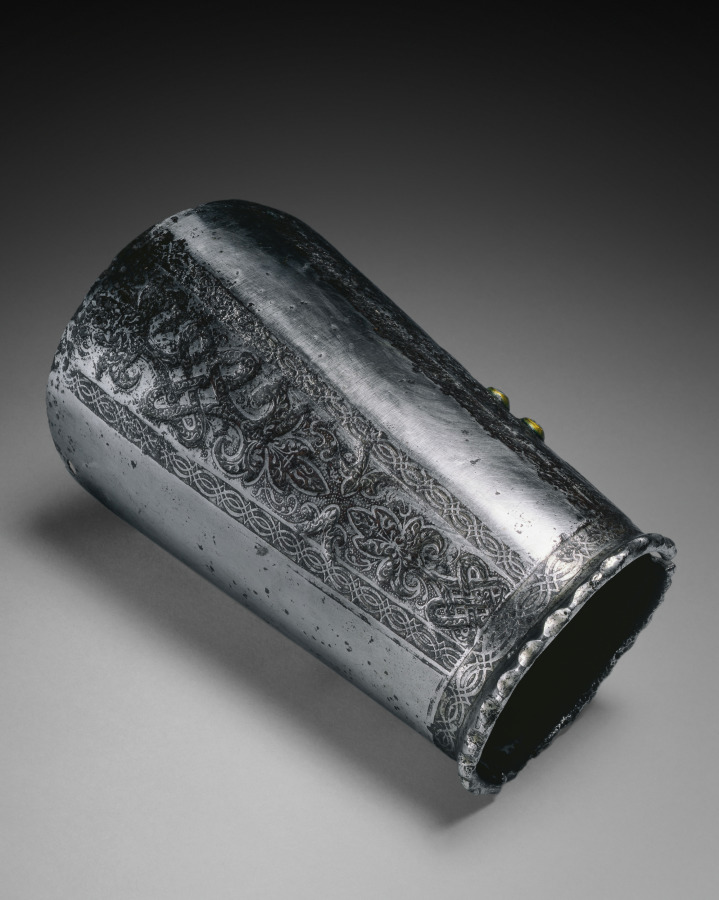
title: Vambrace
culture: Germany, Augsburg, 16th century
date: c. 1560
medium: steel, etched and lightly embossed with strapwork bands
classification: Arms and Armor